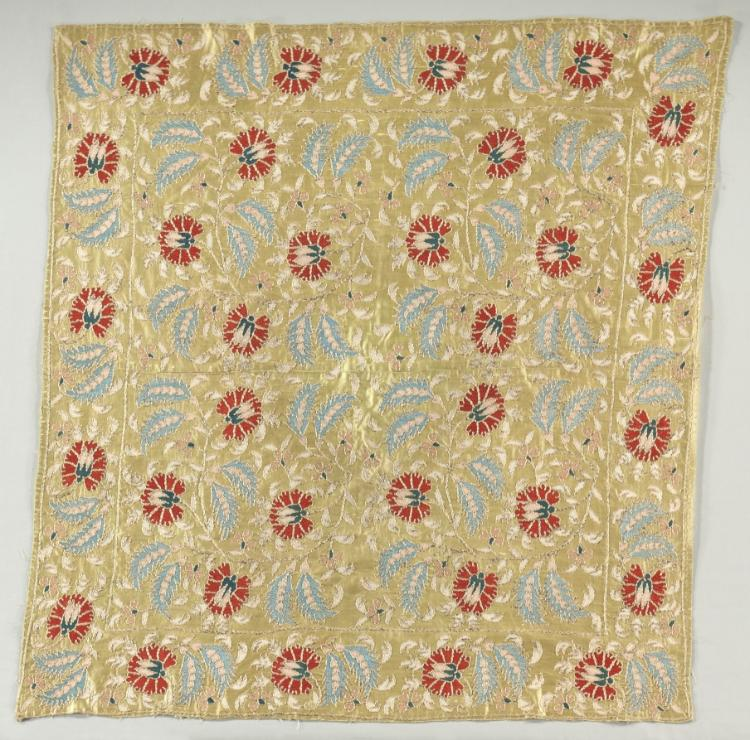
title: Embroidered Cover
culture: Turkey, 18th century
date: 18th century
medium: embroidery; silk and gold filé on silk ground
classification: Embroidery